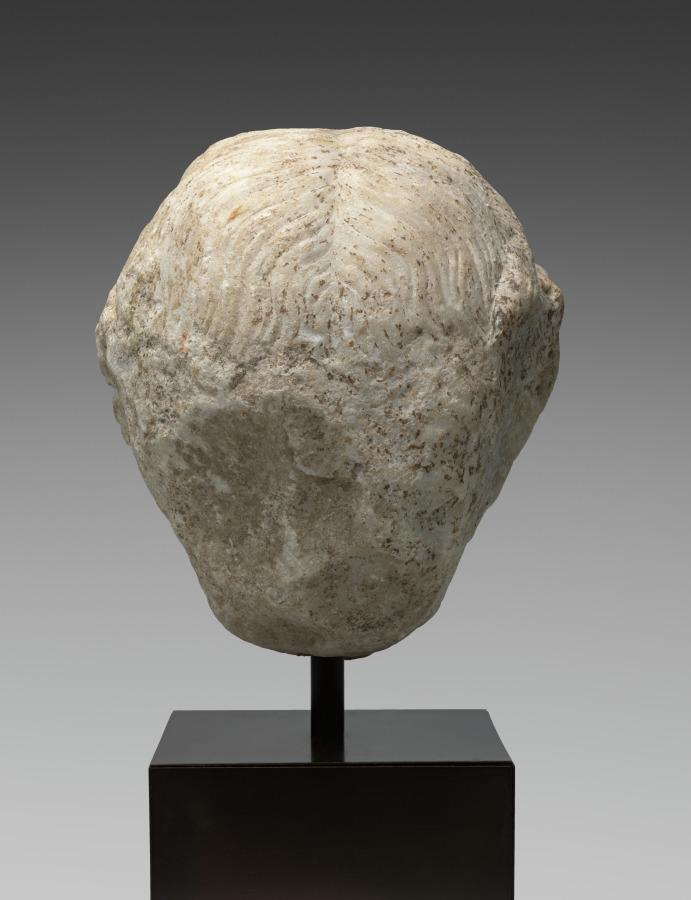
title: Head of Apollo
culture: Roman, Imperial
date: 1–200 CE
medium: marble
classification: Sculpture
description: This marble head, about three-quarter life-sized with idealized features, likely represents Apollo, the god most renowned for his youthful beauty. The hair spreads from a central part, flowing to either side in long and deeply drilled locks that cover the ears. An incised line separates these locks from a rougher area above, probably reserved for a separately made diadem or wreath, likely of metal.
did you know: This head of Apollo has also been identified as female, perhaps a Muse or other goddess.